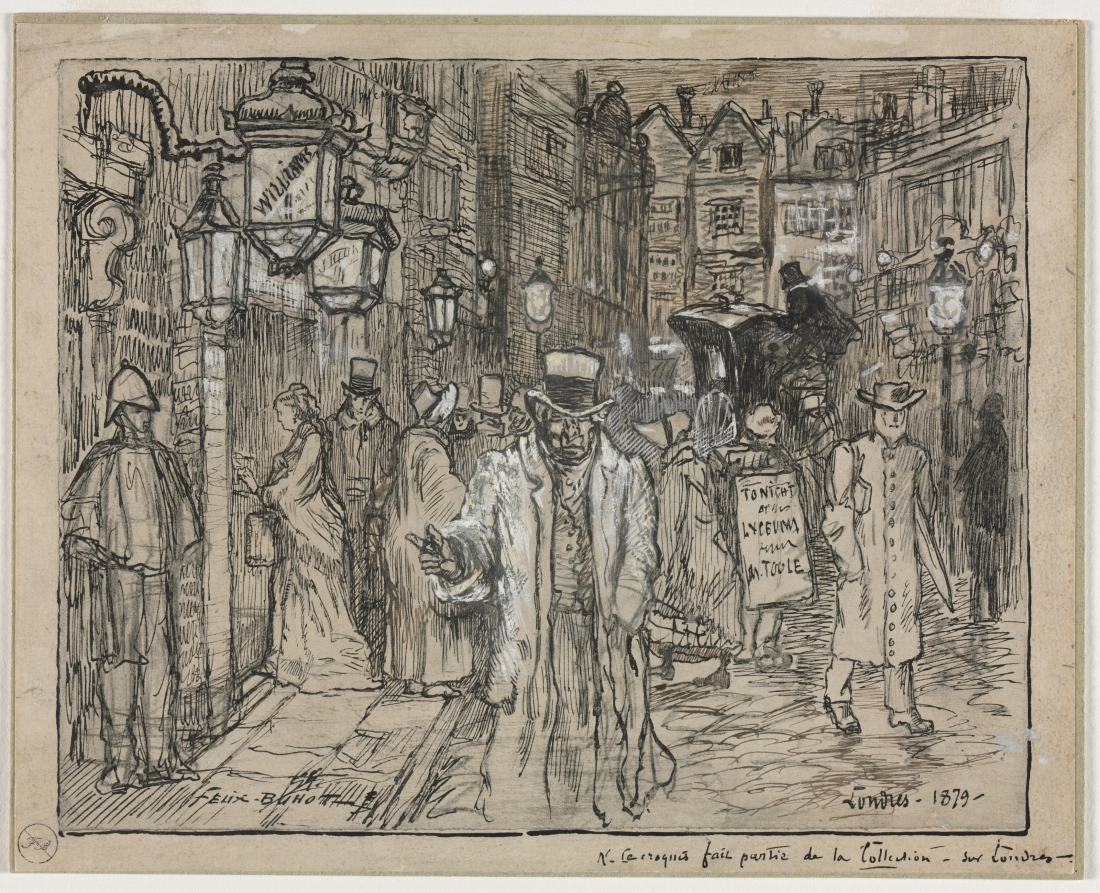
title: Street Scene in London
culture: France, 19th century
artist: Félix Hilaire Buhot (French, 1847–1898)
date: 1879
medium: pen and black and brown ink, black crayon and graphite, heightened with white and yellow gouache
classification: Drawing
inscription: signed, lower left, in black ink: FELIX BUHOT; lower right, in black ink: Lodres - 1879 - / le croquis fait partie de la Collection - sur Londres - ; stamped, lower left, in black ink: FB [circled]